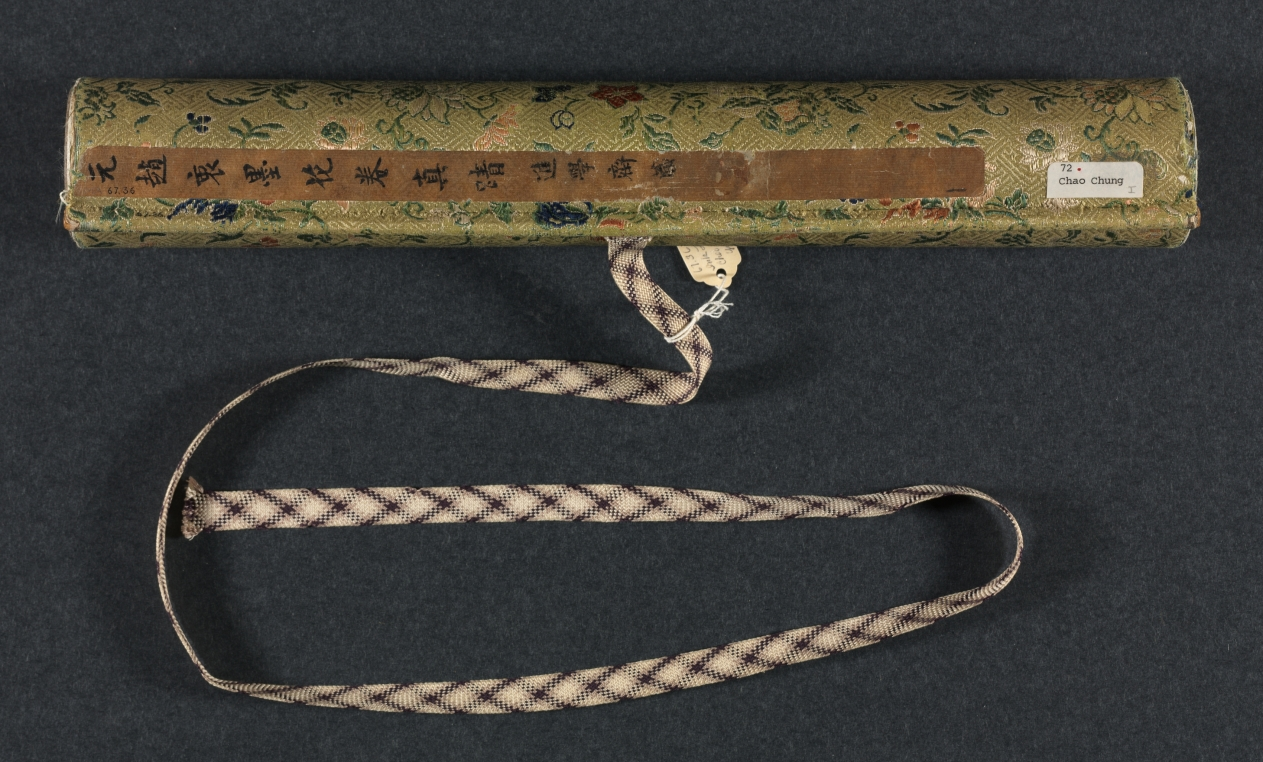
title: Ink Flowers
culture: China, Yuan dynasty (1271-1368)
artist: Zhao Zhong (Chinese, second half of the 1300s)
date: 1361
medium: Handscroll; ink on paper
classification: Painting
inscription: 寶帶同心結，香羅合歡扇。/ 繡作錦鴛鴦，雙雙為君獻。/ 薔薇露灑熏籠衣，馨香奉君君勿違。 原初并題。 [印] 趙衷原初畫記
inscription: 翠袂素羅韈，玉臺黃金盃。浩歌渡弱水。天風卷海三山開，麻姑方平為招飲，蛟宮獻舞銀濤堆。 原初并題。 [印] 雲林清趣、[印] 趙衷原初畫記。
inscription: 右用湯叔雅慶元中所寫墨花法作此卷，又效李長吉體賦詩以題之。詩與畫雖未工，要皆出於古人之餘，譬猶欲成方圓而必求其規矩之用也，識者毋誚焉！至正辛丑八月望日，東吳野人趙衷原初謹識。 [印] 趙原初、[印] 傳世清玩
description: Zhao Zhong's flowers, each paired with a poem, echo the fine-style colored flowers of the academic tradition, but instead he used only ink. Fine lines define the contours of each plant, as well as the veins within each petal and leaf. Careful ink washes give subtle modeling to the forms. The combination of lily, narcissus, and peony is unusual as the three belong to no known seasonal or symbolic system popular in the fourteenth century. Zhao’s medical training may have influenced the selection. Powdered lilies, for example, were prescribed to dispel grief, while the bark of tree peony roots was used as a treatment for various blood disorders.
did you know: This handscroll is a very rare example of ink flowers in the linear baimiao style of the fourteenth century.